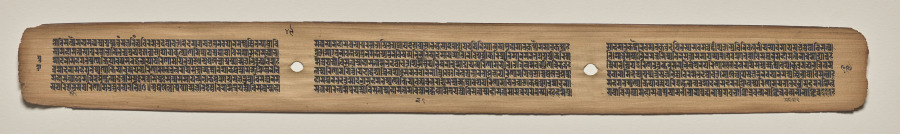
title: Text, folio 49 (verso), from a Manuscript of the Perfection of Wisdom in Eight Thousand Lines (Ashtasahasrika Prajnaparamita-sutra)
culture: Eastern India, Bihar, Vikramashila Monastery. Painting: Nepal, Kathmandu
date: Sunday, September 14, 1119 (year 239 of the Newar Samvat in the month of Ashvina)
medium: gum tempera and ink on palm leaves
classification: Painting